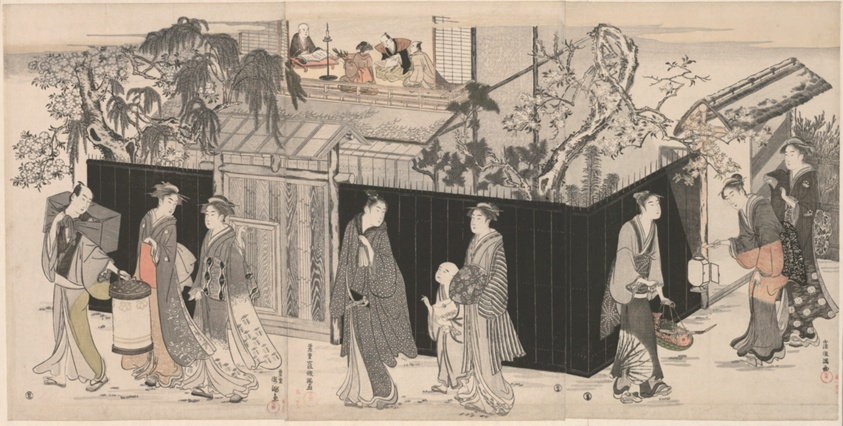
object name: Print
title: Returning from a Poetry Gathering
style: Japanese (culture or style)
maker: Kubo Shunman (Japanese, 1757–1820)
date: c. 1785/89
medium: Color woodblock print; oban triptych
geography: Japan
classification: woodblock print; print; asian art